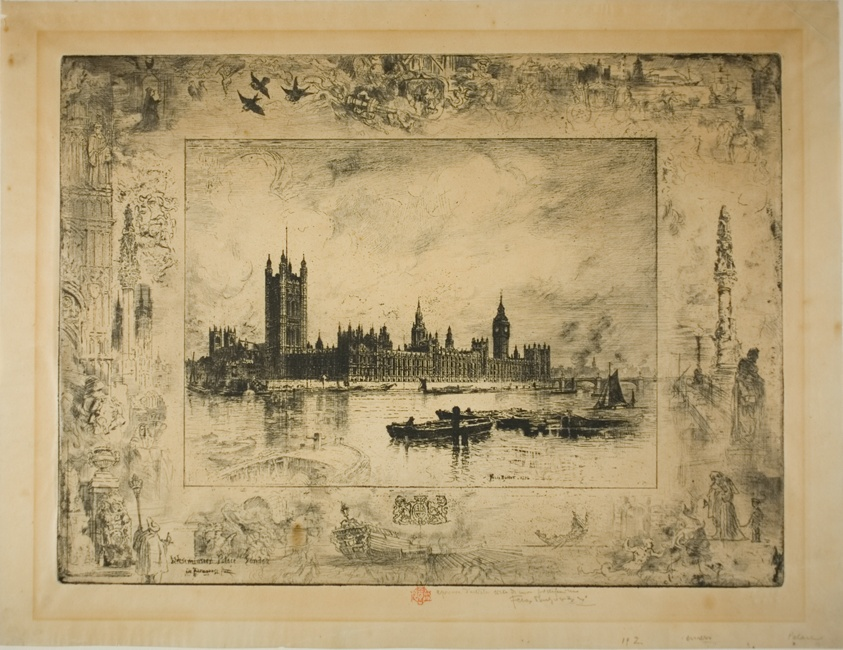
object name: Print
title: Westminster Palace, London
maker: Félix Hilaire Buhot (French, 1847-1898)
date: 1884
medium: Etching and drypoint on cream chine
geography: France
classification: etching; print; prints and drawing